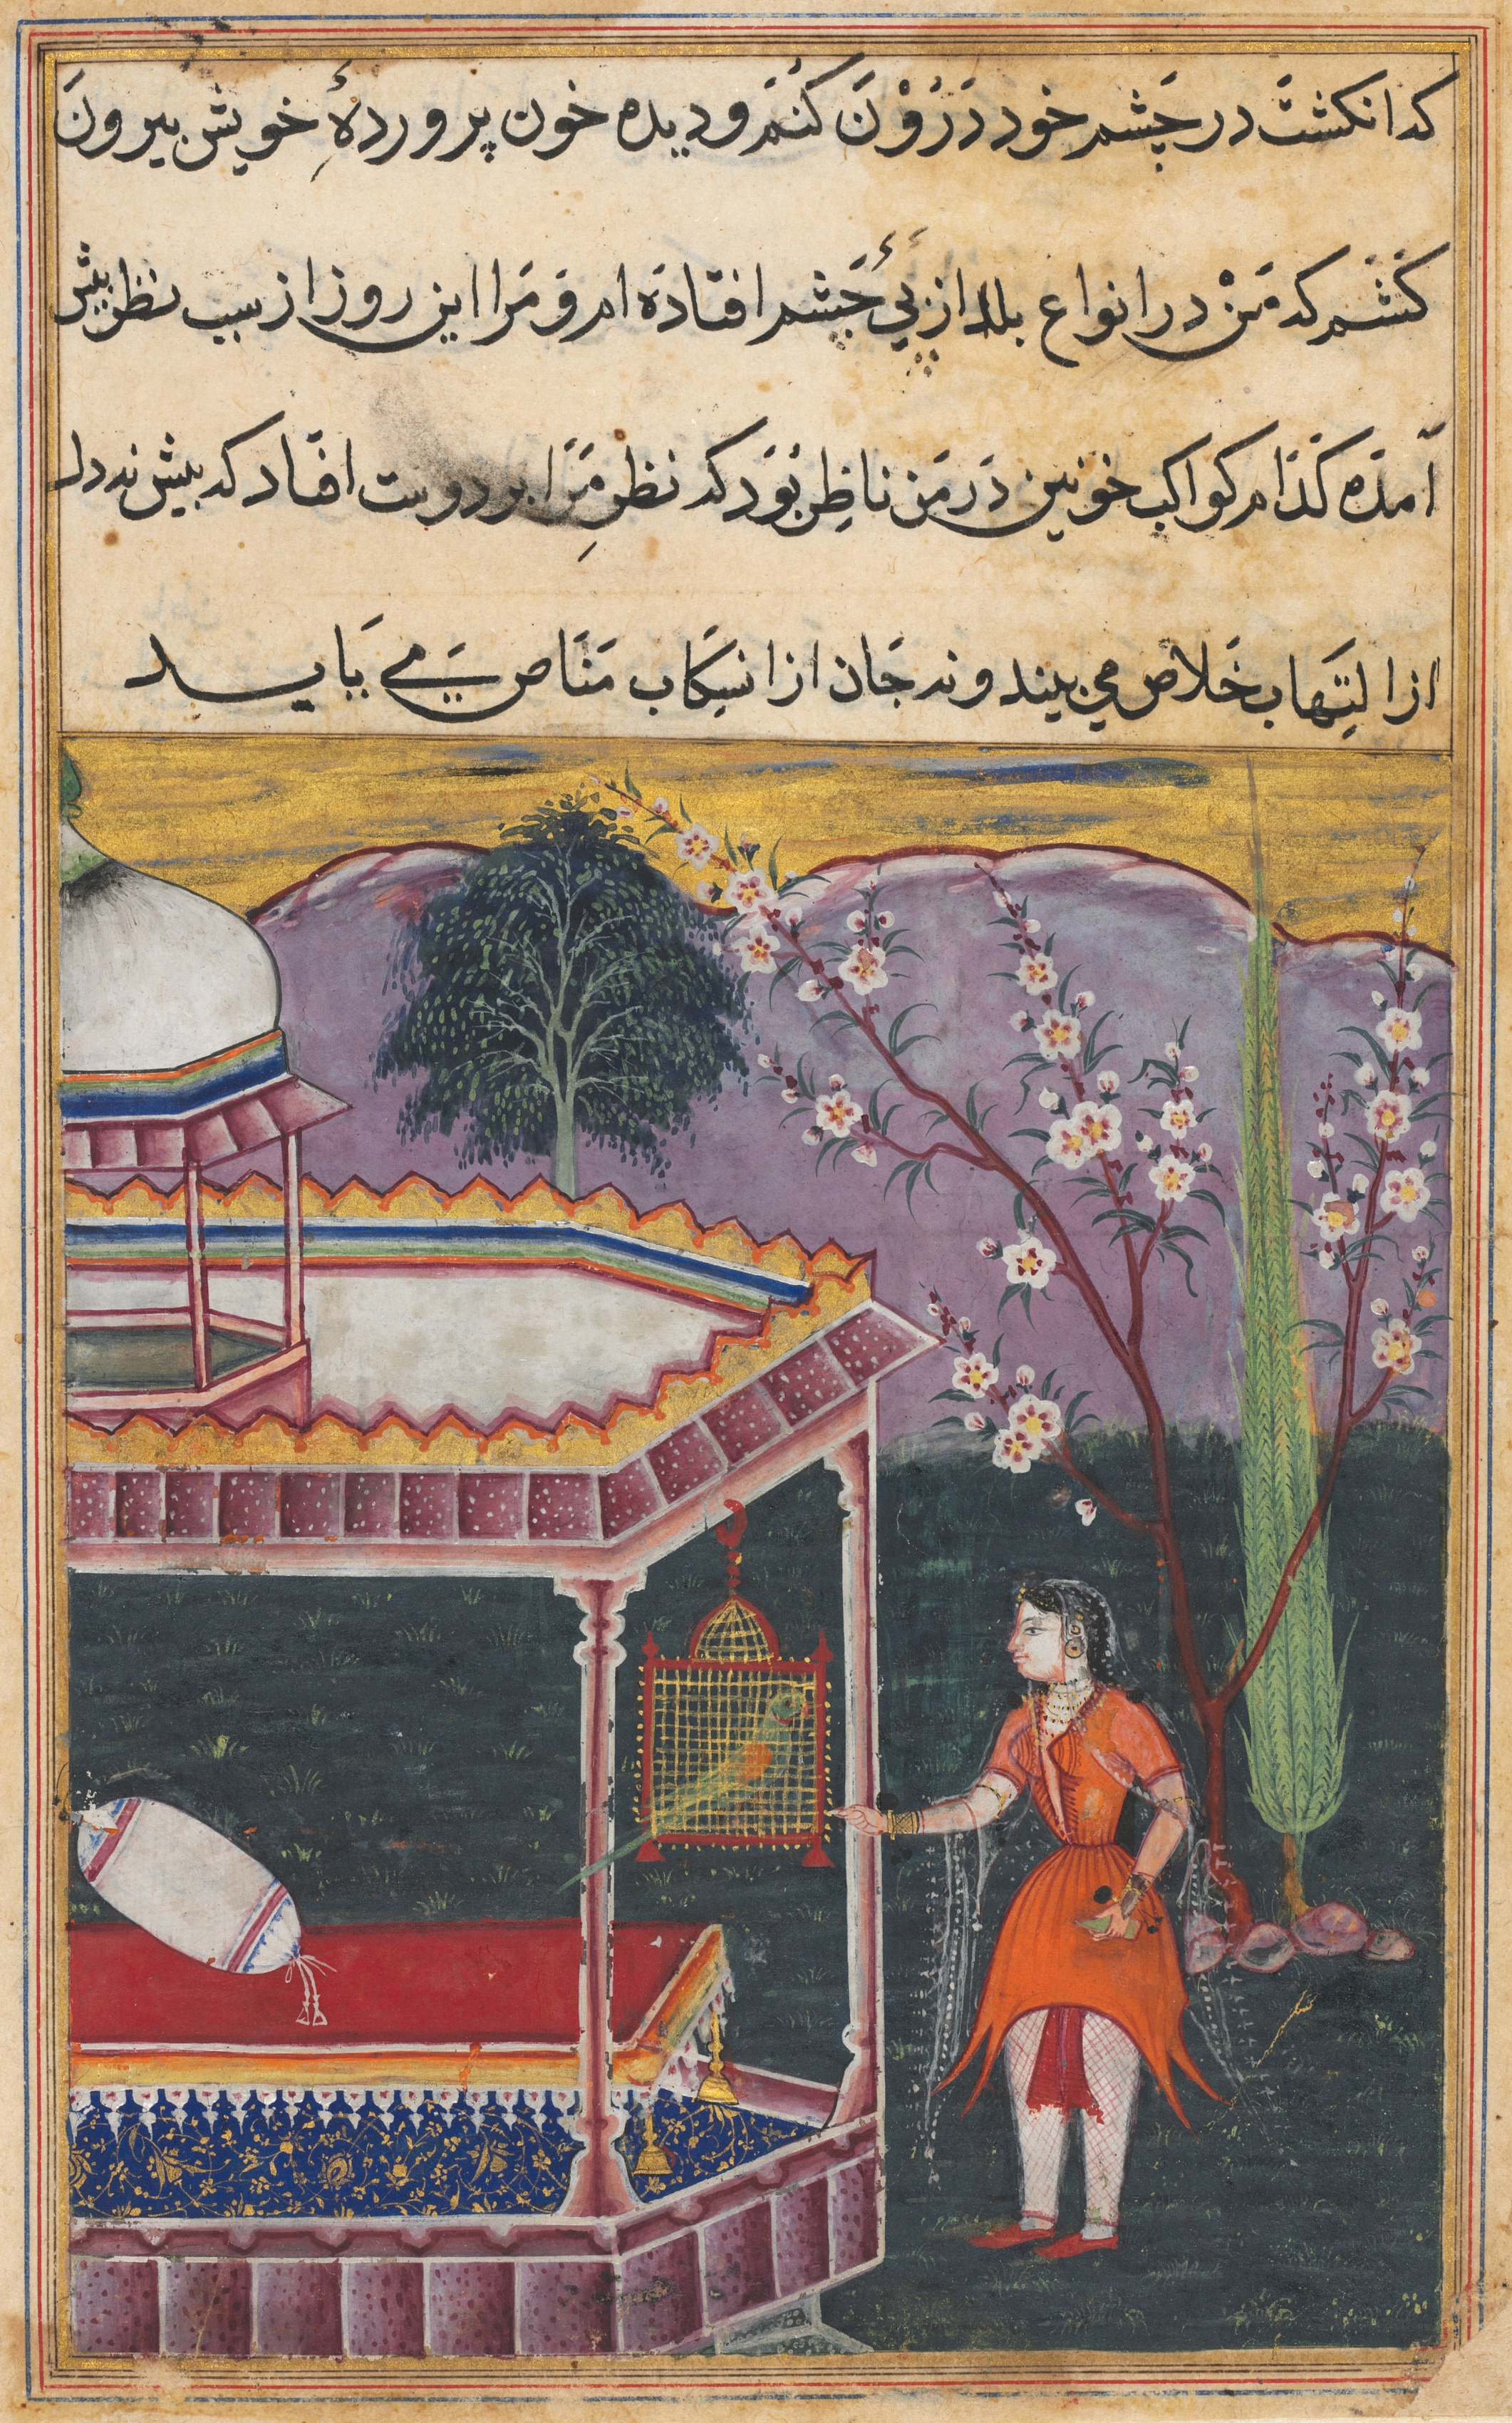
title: Page from Tales of a Parrot (Tuti-nama): text page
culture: Mughal India, court of Akbar (reigned 1556–1605)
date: c. 1560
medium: gum tempera, ink, and gold on paper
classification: Painting